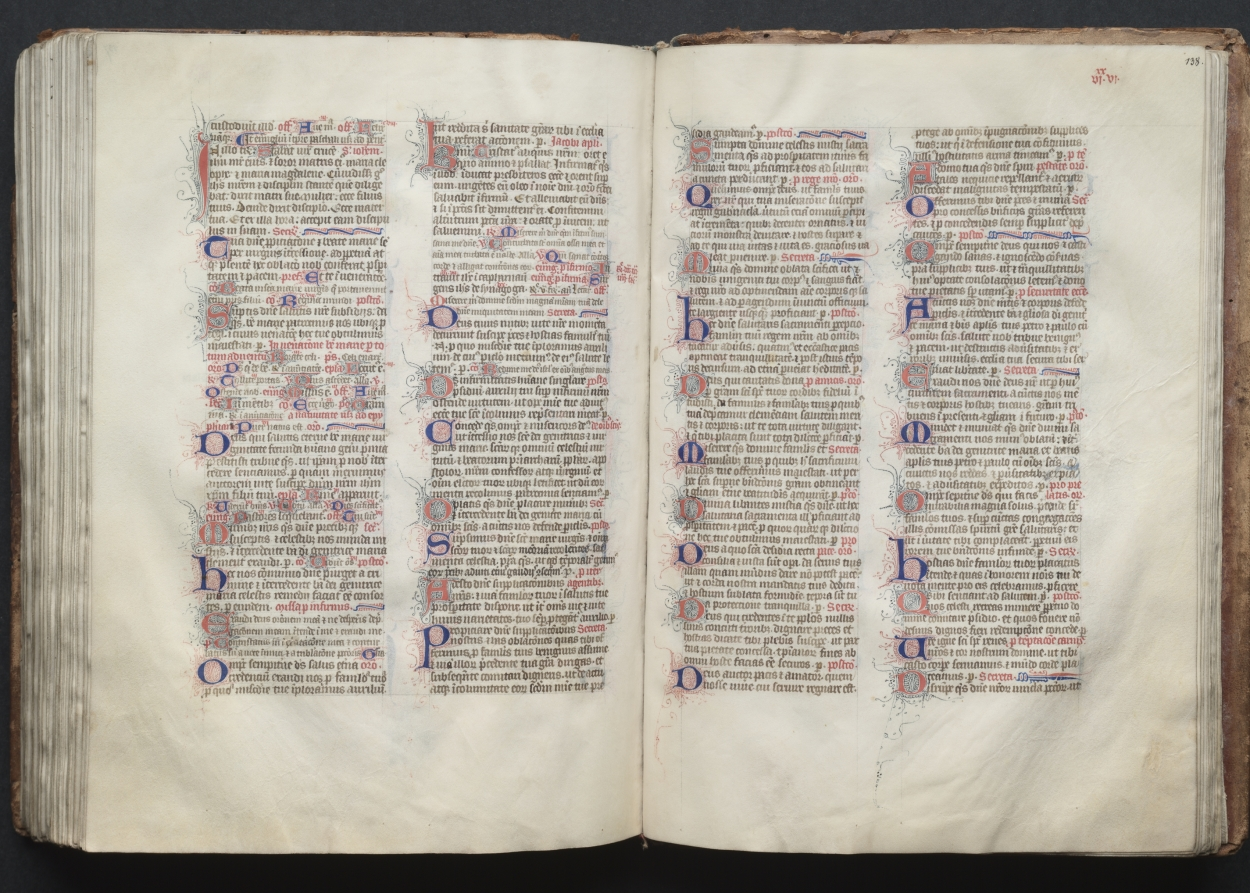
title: The Gotha Missal: Fol. 137v, Text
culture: France, Paris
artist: Master of the Boqueteaux (French)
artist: and Workshop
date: c. 1375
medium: ink, tempera, and gold on vellum; blind-tooled leather binding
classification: Bound Volume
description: The style and quality of this manuscript's decoration is typical of deluxe Parisian books made for aristocratic or royal patrons. Most of the book's decoration appears to be the work of the Master of the Boqueteaux, an artist active at the court of King Charles V (died 1380). His style was apparently shared by a number of book illuminators working in and around Paris. It is very possible that the Gotha Missal belonged to Charles V, but is not provable because the manuscript has no royal portraits and lacks a colophon. Given the book's magnificent decoration, however, it would seem that it was produced for a Valois prince, if not for the king himself. The manuscript receives its name from the German dukes of Gotha, its later owners.